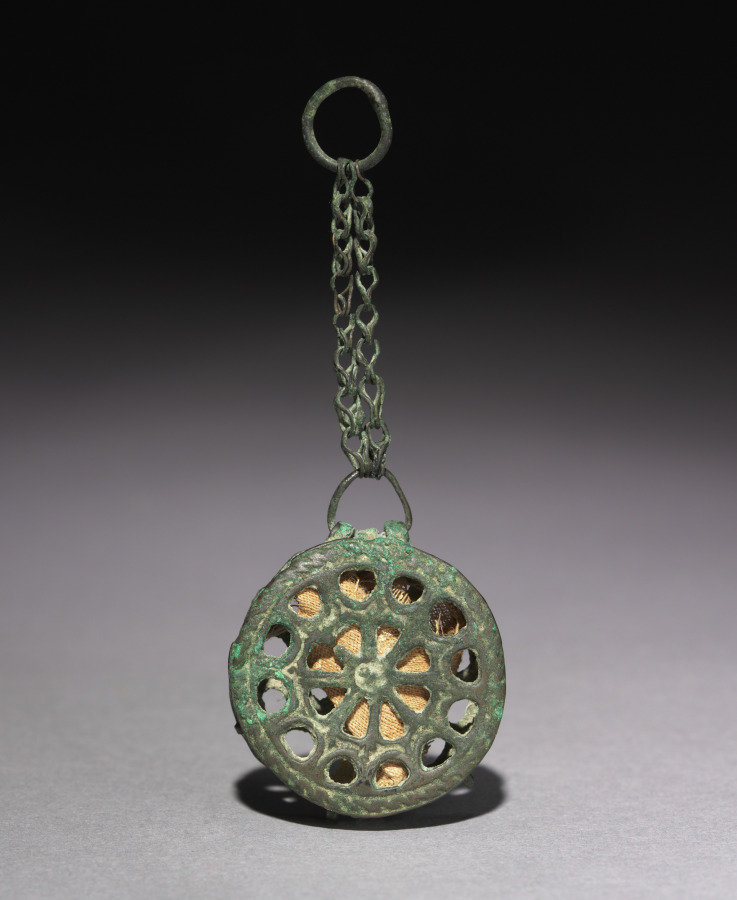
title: Phylactery (Reliquary Penant)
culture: Byzantium, Egypt or Syria, early Byzantine period, 6th-8th centuries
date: c. 500–700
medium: copper alloy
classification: Metalwork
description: Made in the 500s, this Byzantine phylactery, or personal reliquary, was meant to be worn around the neck on a chain. It is fashioned of bronze and still contains its original linen-wrapped relic.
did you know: This was gifted to the museum in memory of Robert P. Bergman, former director of the museum and medievalist.